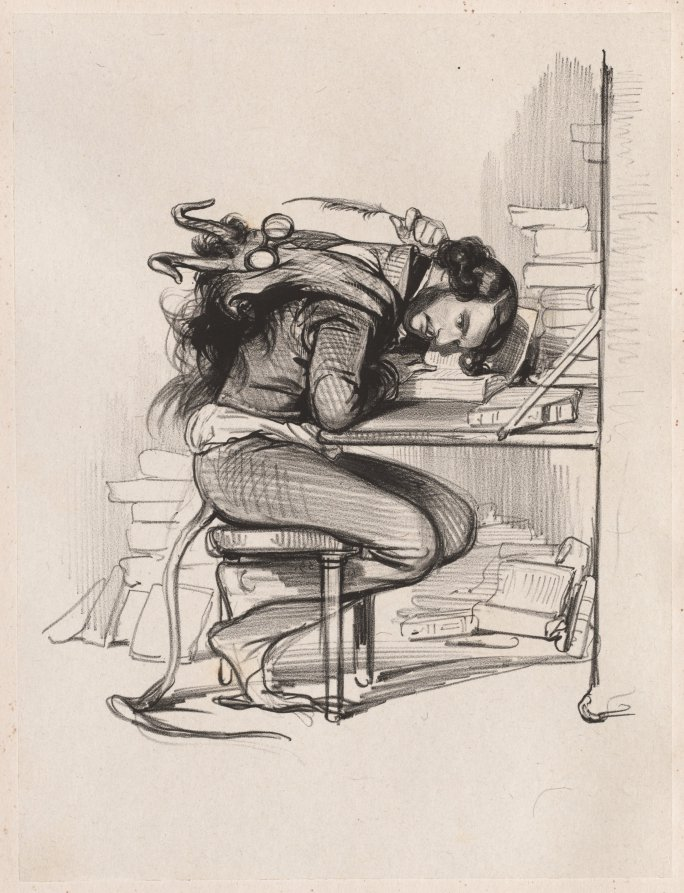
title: Émile Forgues (Old Nick)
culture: France, 19th century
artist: Paul Gavarni (French, 1804–1866)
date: c. 1835–1840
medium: lithograph on chine collé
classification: Print